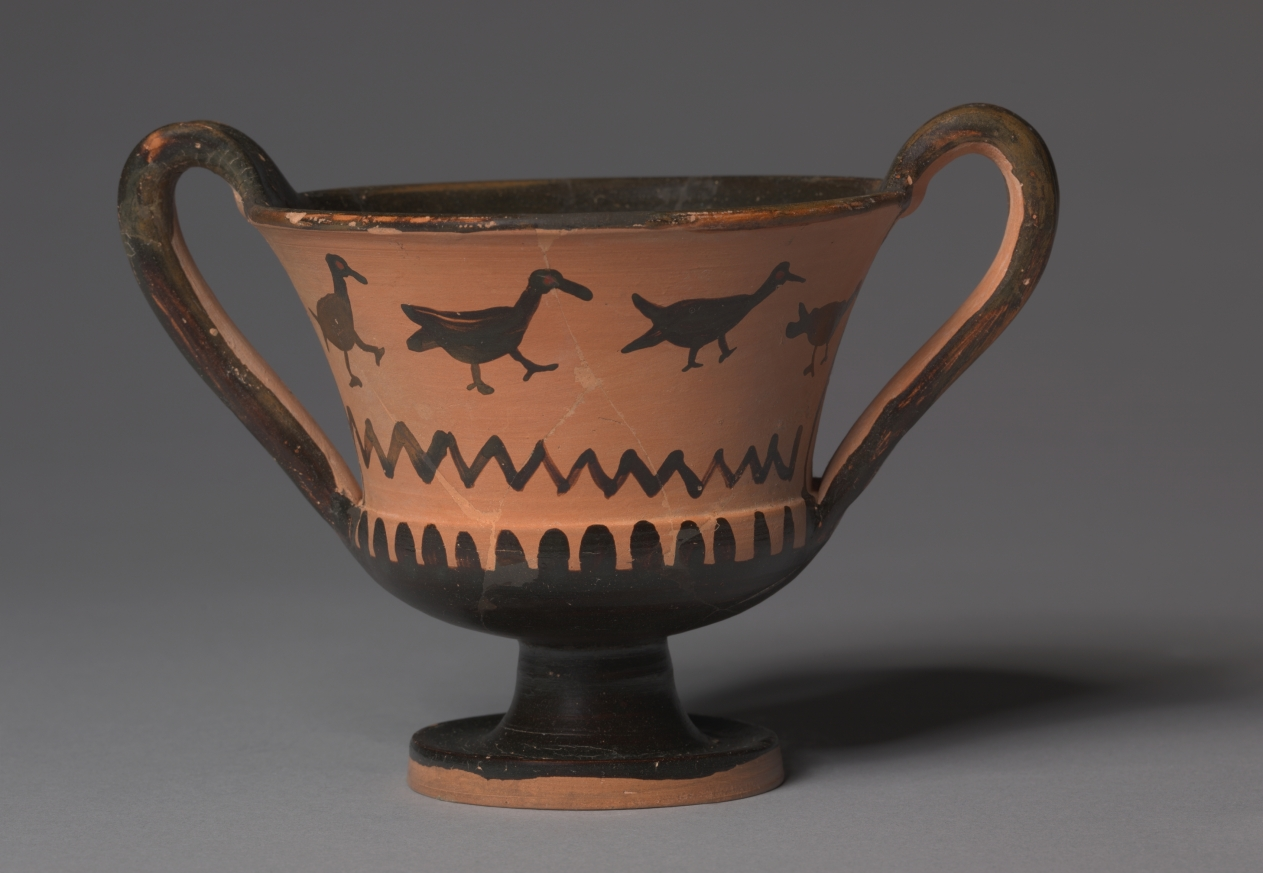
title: Black-Figure Kantharos (Drinking Cup): Lizards Flanking Tree (A); Ducks (B)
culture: Greek, Boiotian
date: c. 500 BCE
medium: ceramic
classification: Ceramic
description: Known as a kantharos and often associated with the wine god Dionysos and the hero Herakles, this type of two-handled drinking cup was particularly popular in Boiotia, a region of central Greece northwest of Athens. Also typical of Boiotia is simple black-figure silhouette decoration, without incision. Here and elsewhere, though, Boiotian vase-painters used red paint for additional detail; note the alternating tree leaves, lizard eyes and spots (on the right), and duck eyes.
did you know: Kantharos, the Greek word for this type of cup, also refers to a dung beetle.